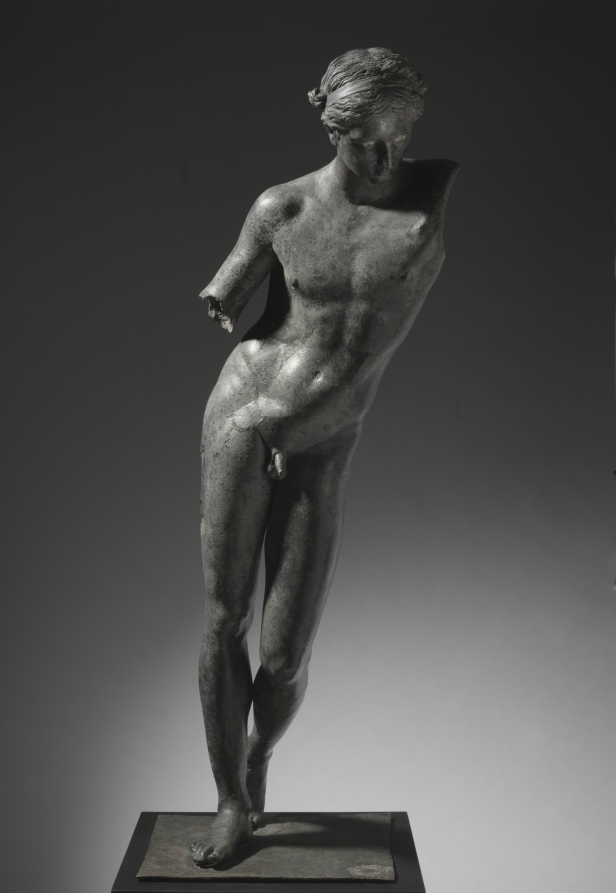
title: The Cleveland Apollo: Apollo Sauroktonos (Lizard-Slayer) or Apollo the Python-Slayer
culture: Greece, Athens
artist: attributed to Praxiteles (Greek, Athenian, c. 400–330 BCE)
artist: or Follower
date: c. 350–200 BCE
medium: bronze, copper, and stone inlay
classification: Sculpture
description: The Cleveland Apollo has been called both Lizard-Slayer (Sauroktonos) and Python-Slayer. The first name comes from the Roman author Pliny the Elder (23–79 CE), who noted in describing bronze works made by the Athenian sculptor Praxiteles (active around 370–330 BCE), “the youthful Apollo [is] known as the Sauroktonos because he is aiming an arrow at a lizard [Greek sauros] which is stealing toward him.” Scholars have long connected this description with artworks showing the young Greek god Apollo in a distinctive pose and hairstyle, standing on his right leg and leaning to his left. In more completely preserved versions, Apollo reaches toward a tree with his left arm and seems to take aim at a lizard. The Cleveland Apollo shows the adolescent god similarly posed and coiffed, making it an important addition to the Apollo Sauroktonos group—the only surviving large-scale bronze sculpture of the type. The young Greek god Apollo, identifiable by his distinctive hairstyle and pose, stands on his right leg and leans to his left, probably toward a now-lost tree. Although now separated, the left forearm and hand survive, together with an unusual lizard-like creature, perhaps drawn from the world of myth. A flat bronze base also remains, though it may be a later adaptation. A tree or other support has been lost, probably smaller than in the marble versions. Given its material and very high artistic quality—note the lifelike hair, fingernails, and inlaid copper lips and nipples—more than one scholar has suggested that the Cleveland Apollo could be the very sculpture seen by Pliny. Some have called the sculpture “Python-Slayer,” seeing the oddly shaped serpentine creature with asymmetrical legs as the mythical Python killed by Apollo in establishing his sanctuary at Delphi. But technical details may explain some of the asymmetry, and no other specific evidence connects it to Delphi. Most scholars would retain the name Sauroktonos (Lizard-Slayer) for the Cleveland Apollo, even as some debate whether it was made by Praxiteles himself or a later follower.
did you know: The Cleveland Apollo is the only surviving large-scale bronze sculpture of its type, Apollo Sauroktonos (the Lizard-Slayer).